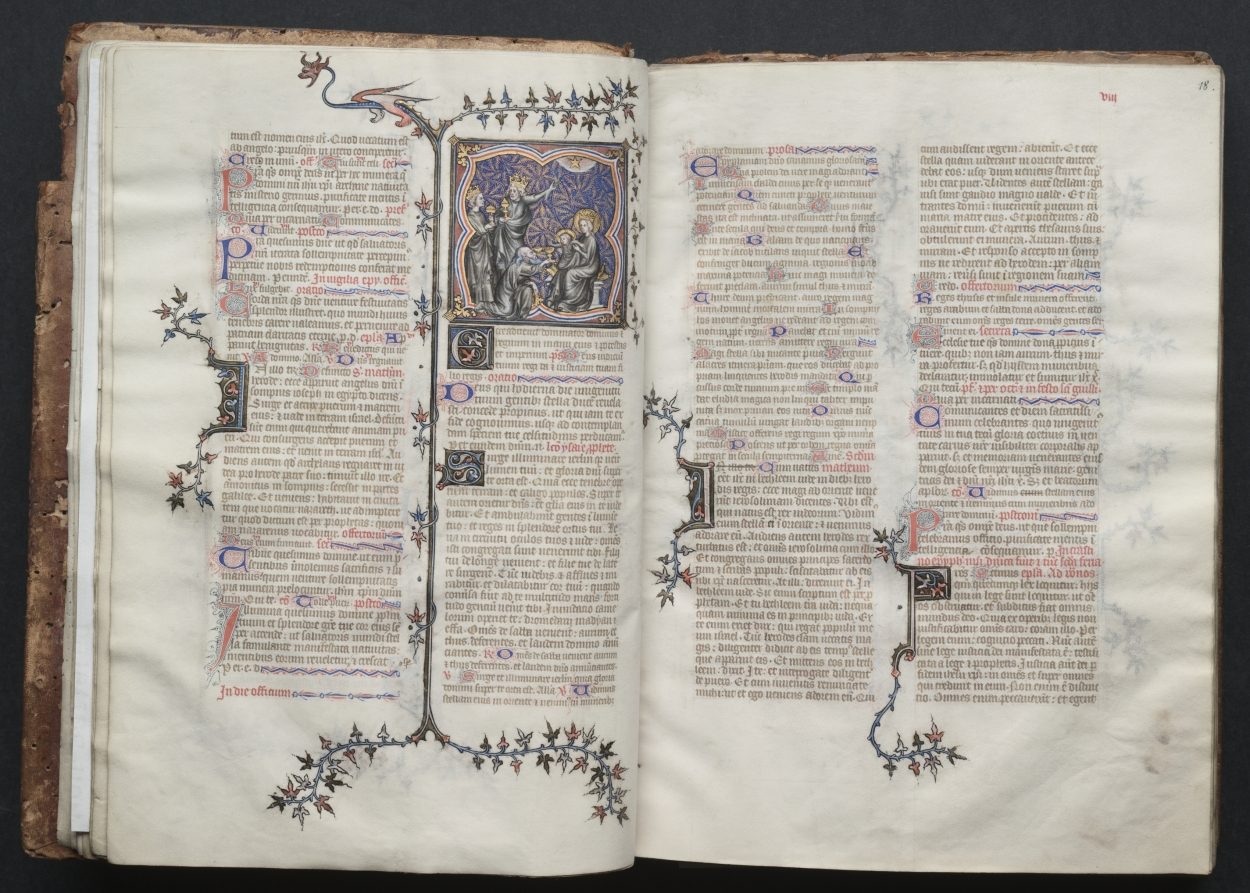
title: The Gotha Missal: Fol. 17v, The Adoration of the Magi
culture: France, Paris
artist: Master of the Boqueteaux (French)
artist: and Workshop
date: c. 1375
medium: ink, tempera, and gold on vellum; blind-tooled leather binding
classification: Bound Volume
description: The style and quality of this manuscript's decoration is typical of deluxe Parisian books made for aristocratic or royal patrons. Most of the book's decoration appears to be the work of the Master of the Boqueteaux, an artist active at the court of King Charles V (died 1380). His style was apparently shared by a number of book illuminators working in and around Paris. It is very possible that the Gotha Missal belonged to Charles V, but is not provable because the manuscript has no royal portraits and lacks a colophon. Given the book's magnificent decoration, however, it would seem that it was produced for a Valois prince, if not for the king himself. The manuscript receives its name from the German dukes of Gotha, its later owners.